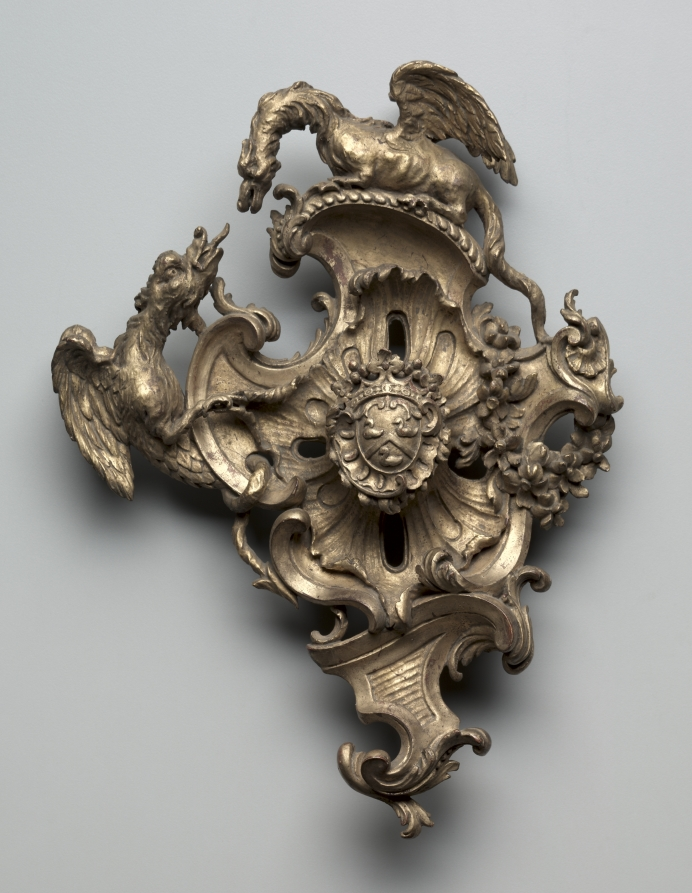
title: Wall Decoration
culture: France, Regency Period, 18th Century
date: 1715–1725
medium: wood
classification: Furniture and woodwork